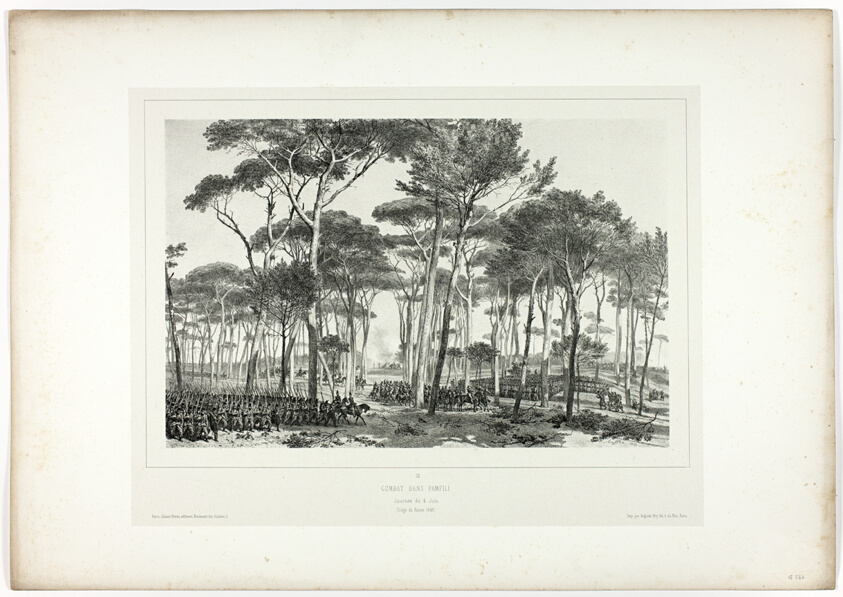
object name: Print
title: Combat in Pamfili, from Souvenirs d’Italie: Expédition de Rome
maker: Denis Auguste Marie Raffet (French, 1804-1860); printed by Auguste Bry (French, 19th century); published by Chez Gihaut Frères (French, 19th century)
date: 1853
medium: Lithograph in black on gray wove chine laid down on ivory wove paper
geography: France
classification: lithograph; print; prints and drawing